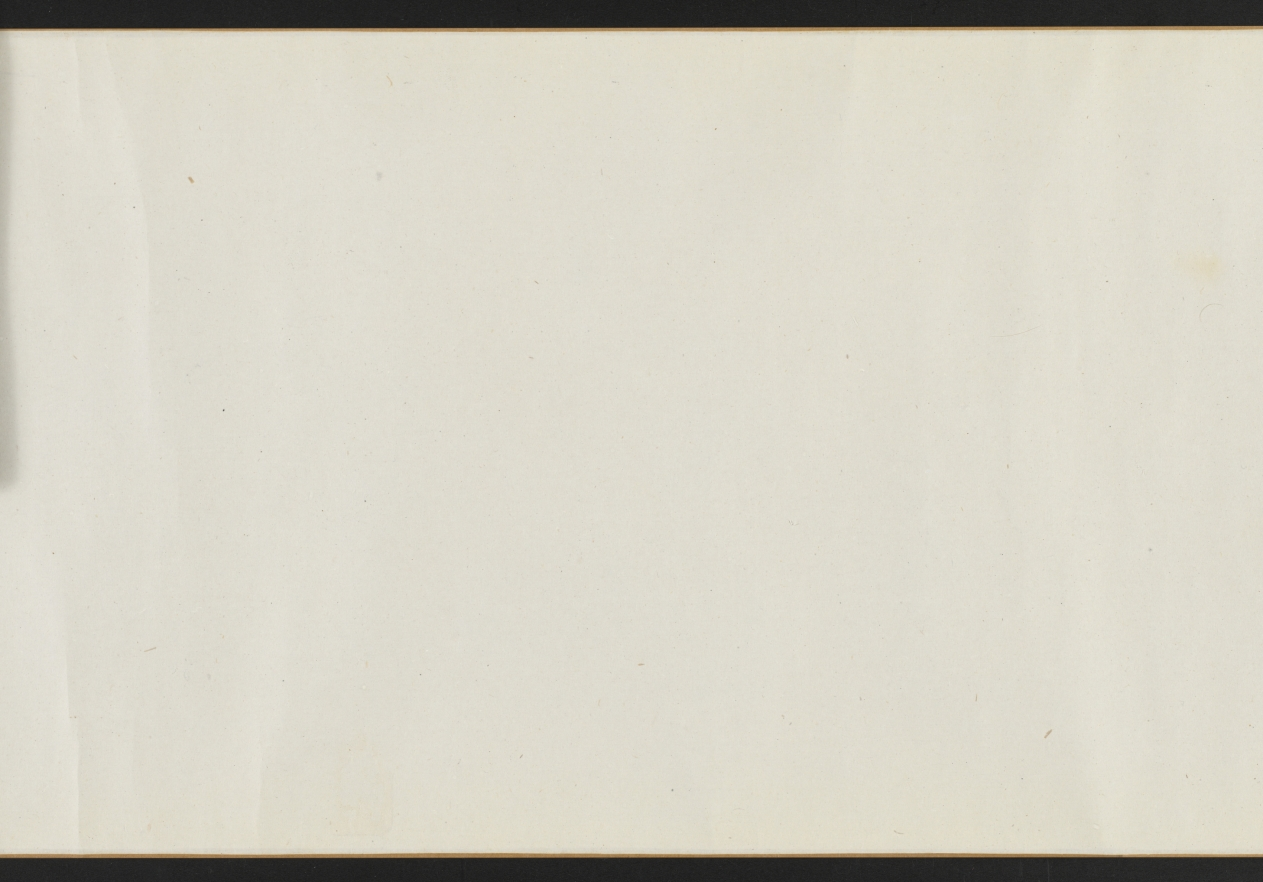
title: Scholar-Hermits in the Autumn Mountains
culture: China, Ming dynasty (1368–1644)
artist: Tang Yin (Chinese, 1470–1523)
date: 1500–1510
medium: handscroll, ink and light color on silk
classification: Painting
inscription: Artist's signature and 2 seals at end of scroll: Tang Yin [seals] T'ang Po-hu; T'ang Tzu'wei t'u-shu.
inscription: Title on frontispiece by Li Cho-kung (dates unknown).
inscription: 1 colophon and 11 additional seals: 1 colophon dated 1915 of Wu Tso-hsi (19th-20th c.); 2 seals of Gao Qifeng 高奇峰 (1889–1933); 5 seals of C. C. Wang 王季遷 (1907–2003); 4 seals unidentified.